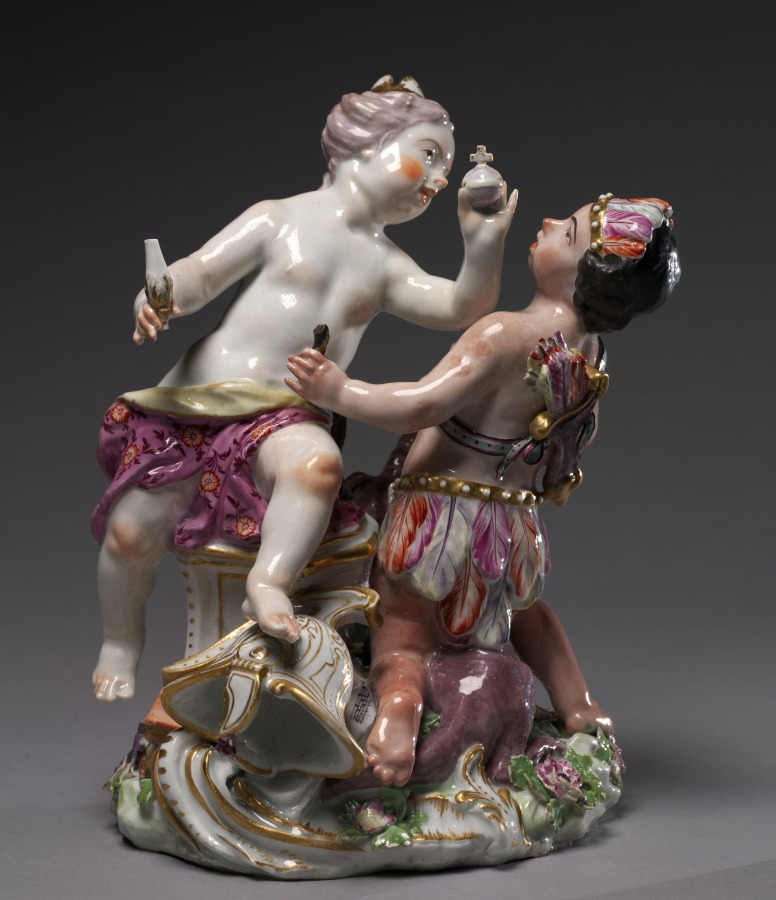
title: Pairs of Figures from the Four Continents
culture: England, Chelsea, mid-18th century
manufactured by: Chelsea Porcelain Factory (Britain, London, 1745–84)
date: c. 1760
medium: soft-paste porcelain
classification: Ceramic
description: Often collected by wealthy British merchants who were beneficiaries of colonial expansion, figural groups were frequently part of elaborate table decorations meant to signify wealth and global prominence. In one pair, Europe is seen holding an orb and wearing a crown as queen of the world, suggesting Europe’s supremacy over the other continents. She is entangled with America, who is wearing feathers with a bow and arrow at her feet. Africa, who wears an elephant headdress and holds a scorpion in one hand, wrestles with Asia, who is surrounded by perfumes and native fruits. Today we recognize these depictions of America, Africa, and Asia as racial stereotypes, revealing a purely imagined understanding of other cultures and continents at the time.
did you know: Figural representations of the four continents date back to the 1500s, but such imagery became even more popular in the 1700s as European empires expanded.